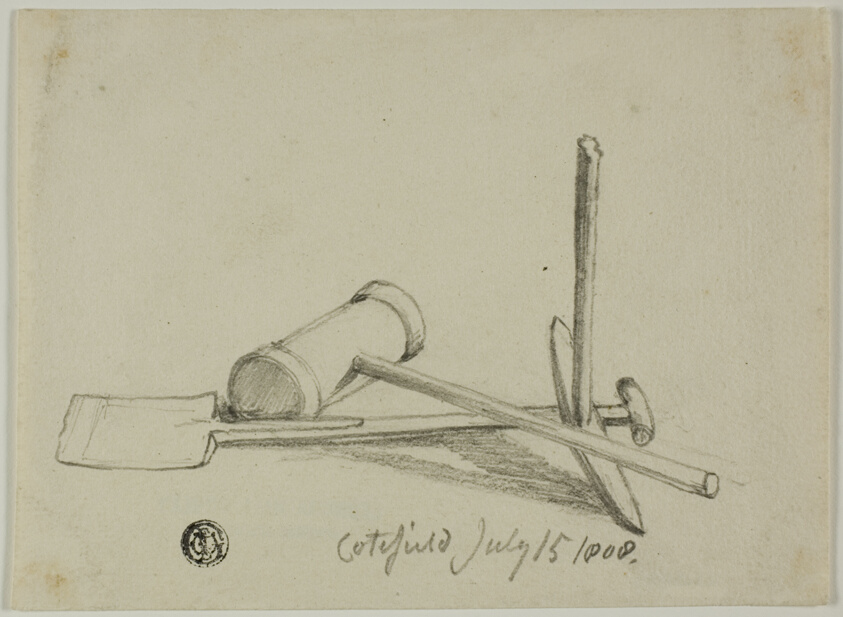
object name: Drawing and Watercolor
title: Mallet, Pick and Shovel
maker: Joshua Cristall (English, c. 1767-1847)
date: 1808/47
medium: Black chalk, on cream wove paper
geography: England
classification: chalk; drawings (visual works); prints and drawing